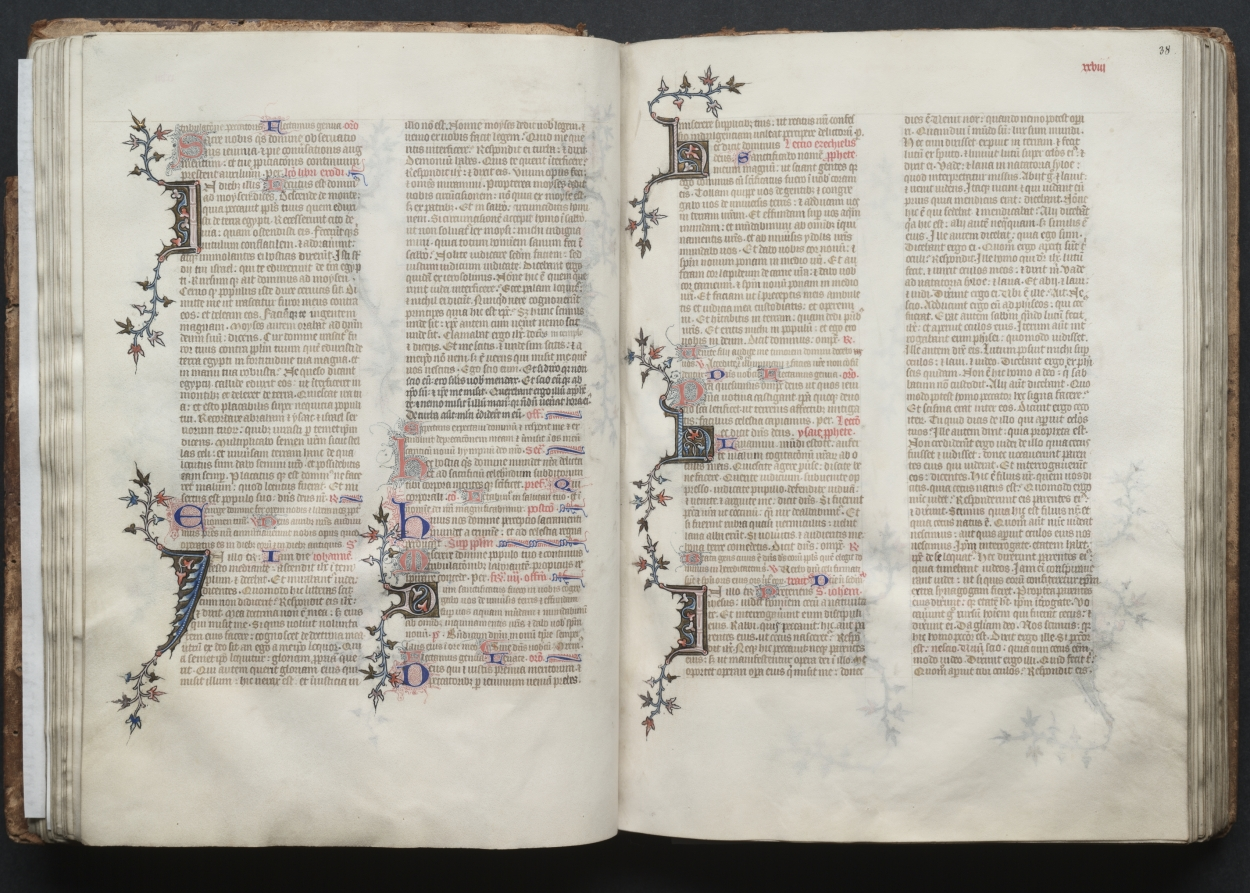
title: The Gotha Missal: Fol. 37v, Text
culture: France, Paris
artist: Master of the Boqueteaux (French)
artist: and Workshop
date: c. 1375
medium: ink, tempera, and gold on vellum; blind-tooled leather binding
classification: Bound Volume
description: The style and quality of this manuscript's decoration is typical of deluxe Parisian books made for aristocratic or royal patrons. Most of the book's decoration appears to be the work of the Master of the Boqueteaux, an artist active at the court of King Charles V (died 1380). His style was apparently shared by a number of book illuminators working in and around Paris. It is very possible that the Gotha Missal belonged to Charles V, but is not provable because the manuscript has no royal portraits and lacks a colophon. Given the book's magnificent decoration, however, it would seem that it was produced for a Valois prince, if not for the king himself. The manuscript receives its name from the German dukes of Gotha, its later owners.